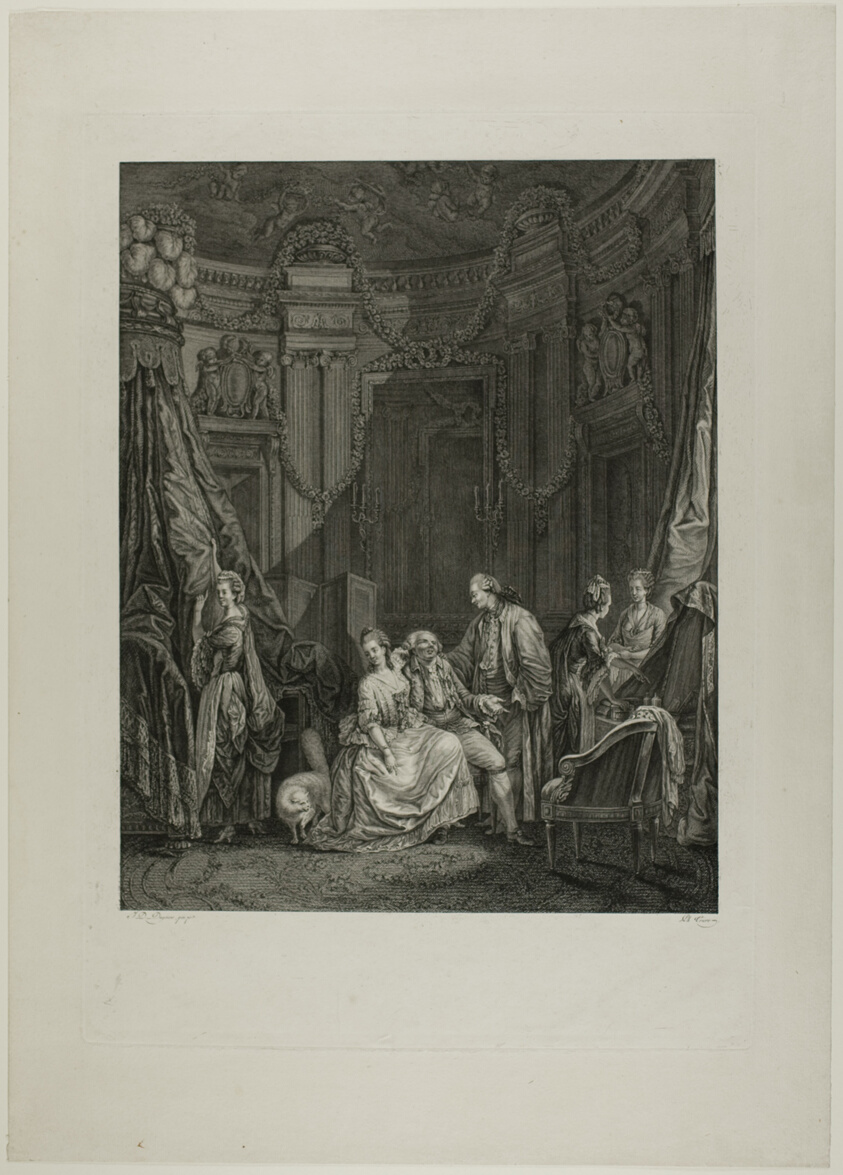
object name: Print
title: Le Lever de la Mariée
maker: Philippe Trière (French, 1756-c. 1815); after Jean Démosthène Dugourc (French, 1749-1825)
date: 1781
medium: Etching and engraving in black on ivory laid paper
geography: France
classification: etching; print; prints and drawing